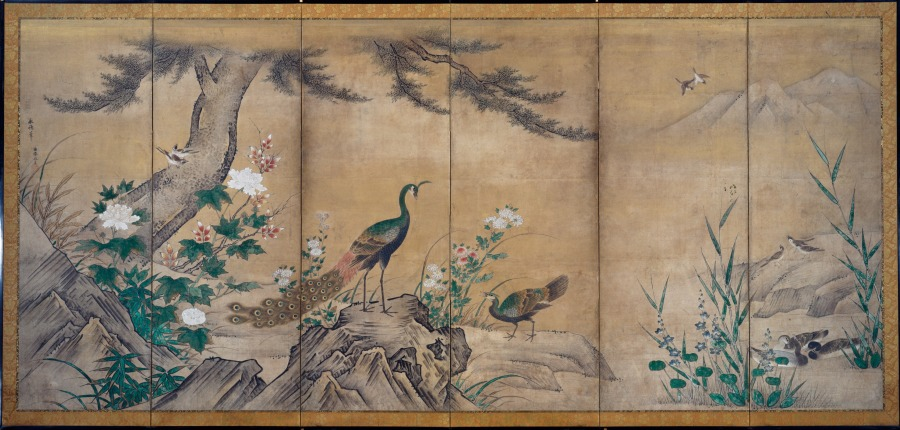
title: Birds and Flowers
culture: Japan, Momoyama period (1573–1615)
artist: Kano Mitsunobu (Japanese, 1565–1608)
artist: and Kano Shōei (Japanese, 1519–1592)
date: late 1500s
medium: Pair of six-panel folding screens; ink, color, and gold on paper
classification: Painting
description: The landscape depicted in this pair of screens follows a seasonal progression from right to left, starting with the blossoming plum of early spring and ending with late autumn peonies. A variety of smaller birds are positioned throughout the scene, and a trio of swimming ducks is bracketed by early summer irises and early autumn bellflowers at the center. While some raptors (birds of prey) terrorize a pheasant and an egret (a waterfowl) to the right, a peacock and peahen converse to the left. Hawks are associated with military prowess, while the peafowl suggest cultural prestige.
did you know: The inscriptions on these screens are not signatures of the artist, but instead an attribution to the painter Kano Eitoku (1543–1590) by his youngest brother, Kano Naganobu (1577–1654).